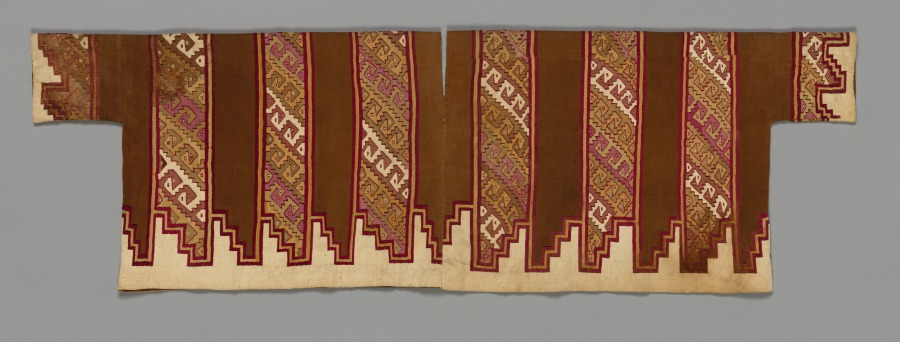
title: Sleeved Tunic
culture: Central Andes, central coast, Chancay people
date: 1460s–1532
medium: Cotton, camelid fiber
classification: Textile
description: The Chancay (chan-kai) people of Peru’s central coast created one of the ancient Andes’s best-known textile legacies through artistically elaborate men’s tunics and loin cloths, women’s dresses and headcloths, and shawl-like mantles. Two traits indicate that this tunic is a high-prestige garment: its labor-intensive tapestry-woven technique and its substantial use of alpaca fiber imported from the adjacent highlands.